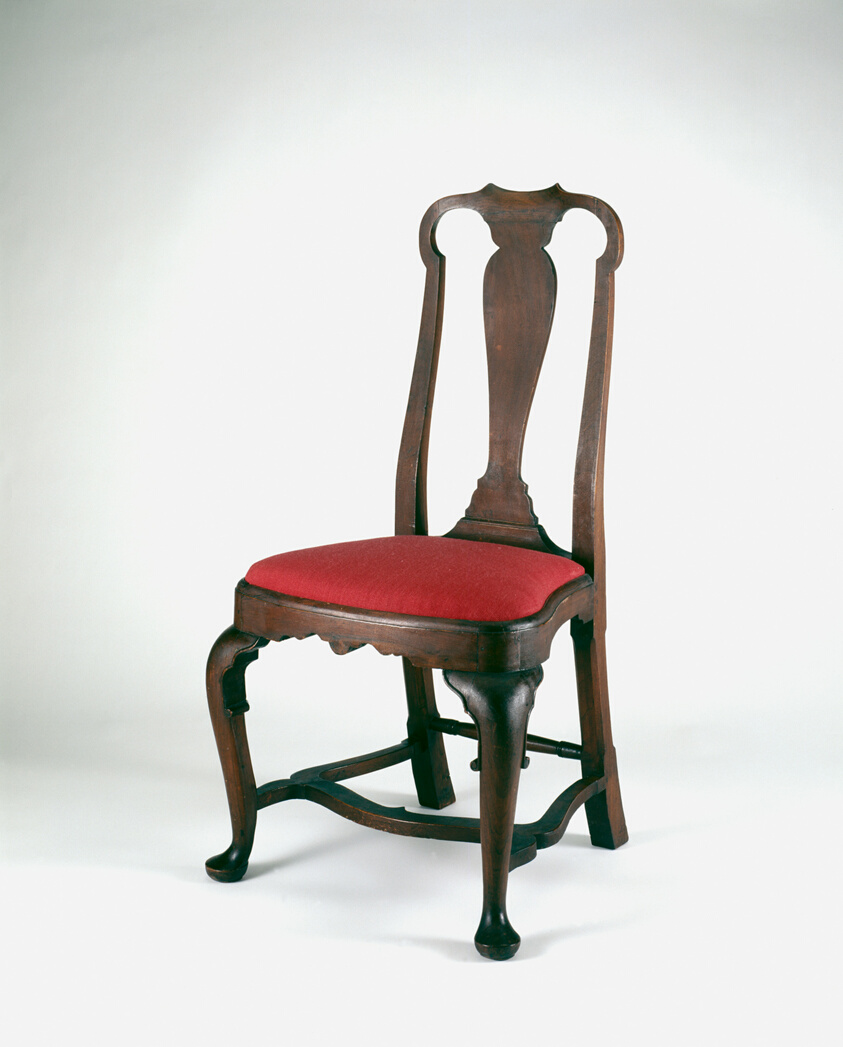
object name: Furniture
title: Side Chair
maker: Artist unknown (American, 18th century); Newport, Rhode Island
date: 1730–60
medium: White pine and upholstery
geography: Newport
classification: seating; furniture; american decorative arts; american arts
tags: furniture